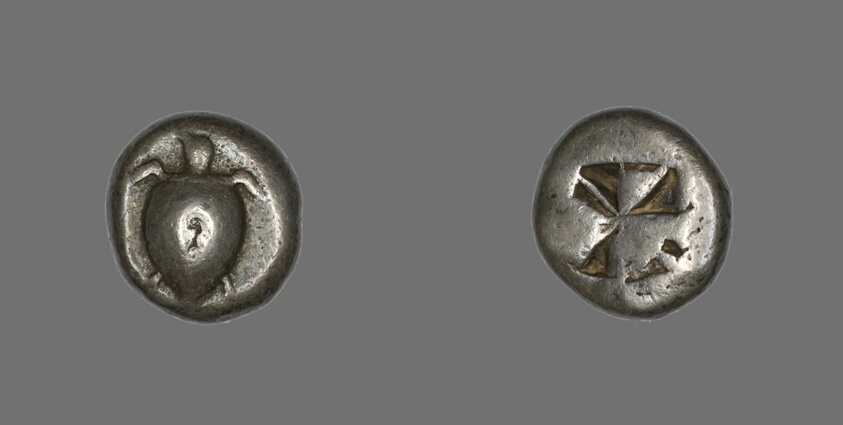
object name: Coin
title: Stater (Coin) Depicting a Sea Turtle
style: archaic (greek), ancient, greek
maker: Greek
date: 650-600 BCE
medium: Silver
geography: Greece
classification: coin; ancient art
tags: turtle